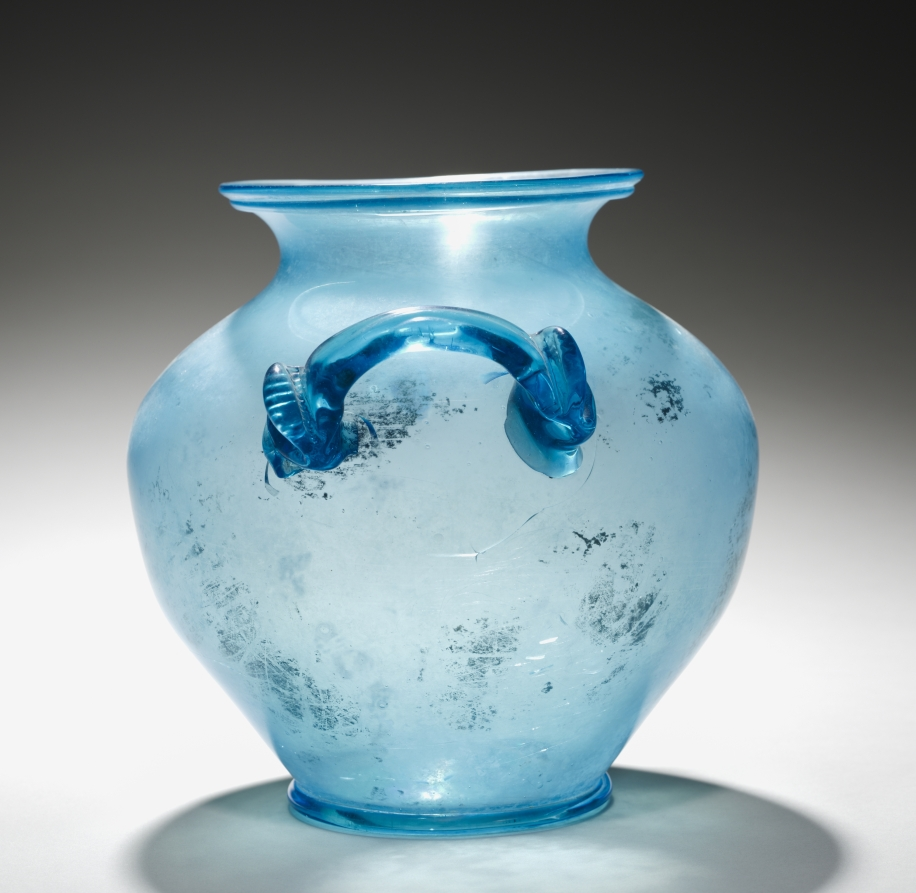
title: Cinerary Urn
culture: Italy, Roman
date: 1–200 CE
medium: glass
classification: Glass